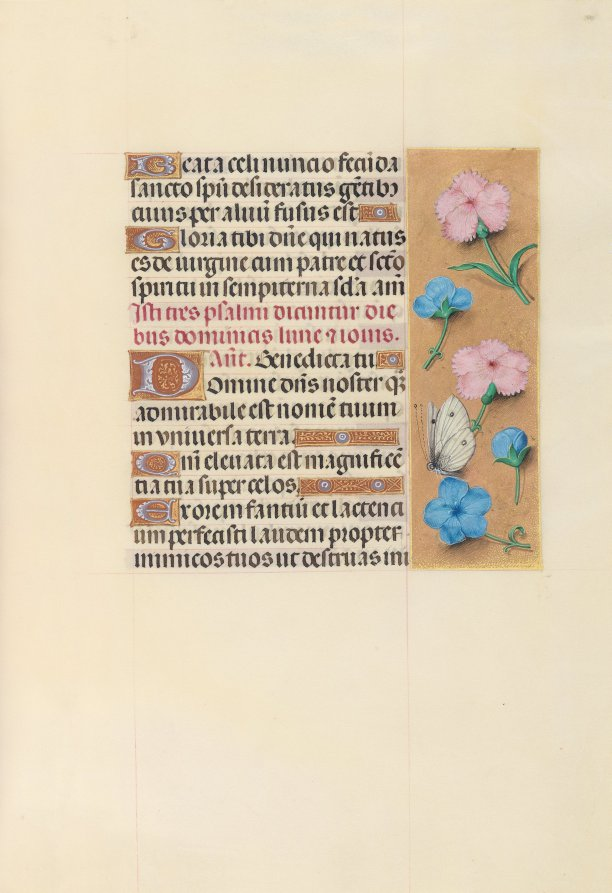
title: Hours of Queen Isabella the Catholic, Queen of Spain: Fol. 100r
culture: Flanders, Ghent and Bruges, late 15th century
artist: Master of the First Prayerbook of Maximillian (Flemish, c. 1444–1519)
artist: and Associates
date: c. 1500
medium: ink, tempera, and gold on vellum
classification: Bound Volume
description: This manuscript was illuminated by a circle of at least five highly organized manuscript painters active in the Flemish cities of Ghent and Bruges. The principal illuminator was Alexander Bening, who painted the majority of the book's miniatures. Manuscripts produced by this circle of artists are renowned for the decoration of their borders, which typically feature a rich variety of realistically-painted flowers, birds, and butterflies. This prayer book, called a book of hours, was intended not for a cleric, but for the private devotions of a lay person-in this case, Isabella the Catholic, Queen of Spain (1451-1504). Isabella's coat of arms embellishes the book's frontispiece. It is unlikely that the book was commissioned by the Queen herself; rather, she probably received it as a diplomatic gift from someone courting her patronage, perhaps Cardinal Francisco Jimenez de Cisneros. A Franciscan friar, Jimenez was dependent upon Isabella for his advancement, first to the post of Queen's confessor in 1492, and then to Archbishop of Toledo in 1495.